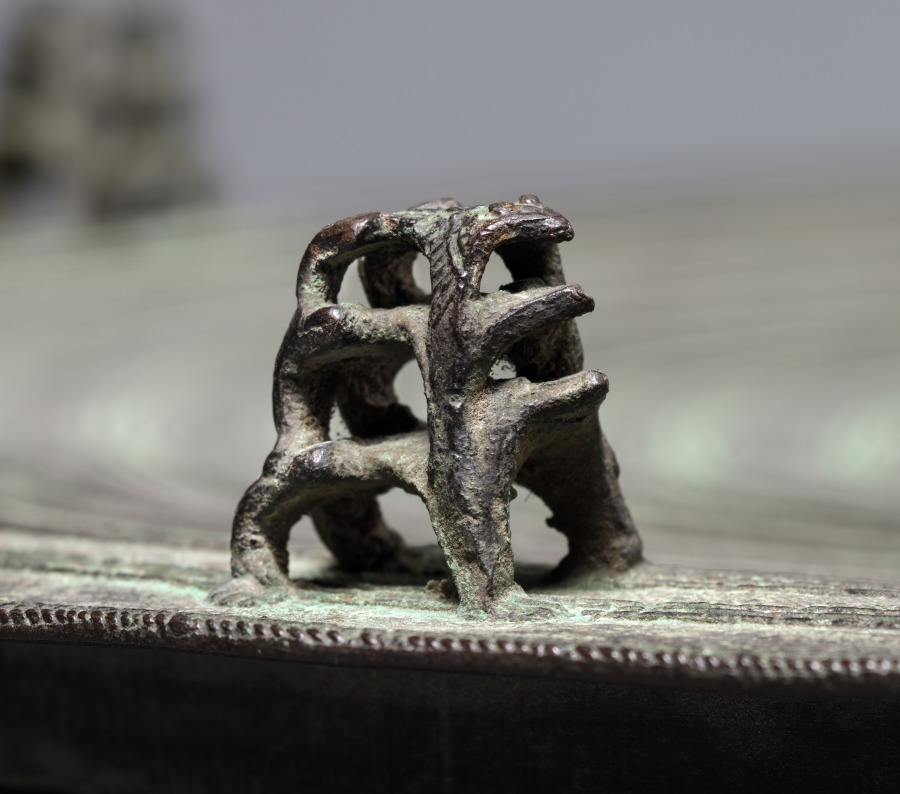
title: Dongson Drum Top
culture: Southeast Asia, Thailand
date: 300–400 CE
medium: bronze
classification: Metalwork